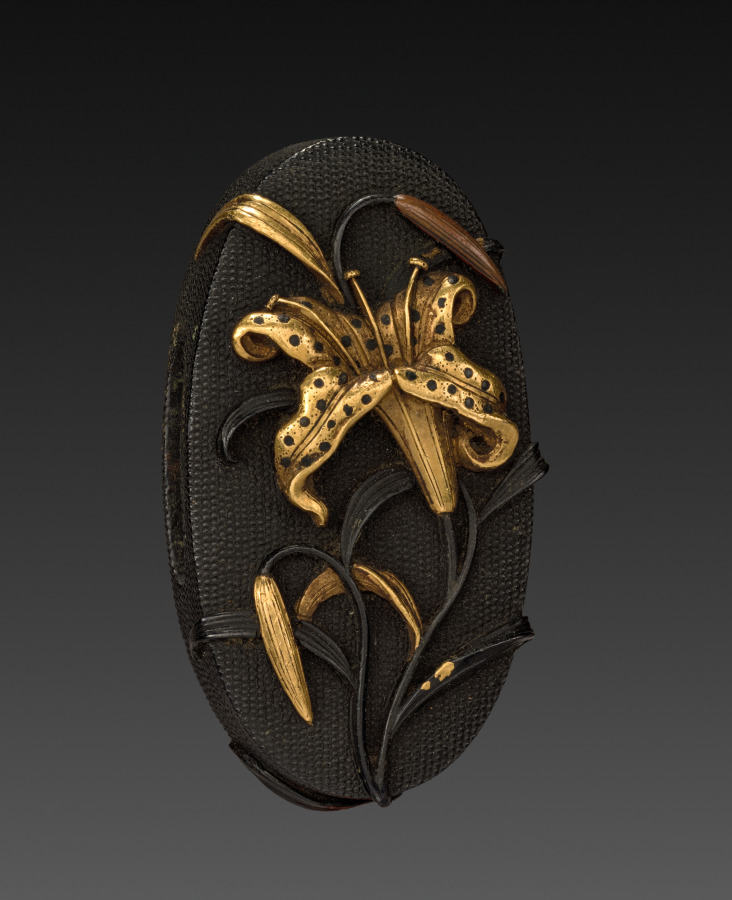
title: Sword-Hilt Pommel (Kashira)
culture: Japan, Edo period (1615–1868)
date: 1700–1850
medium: shakudo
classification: Arms and Armor